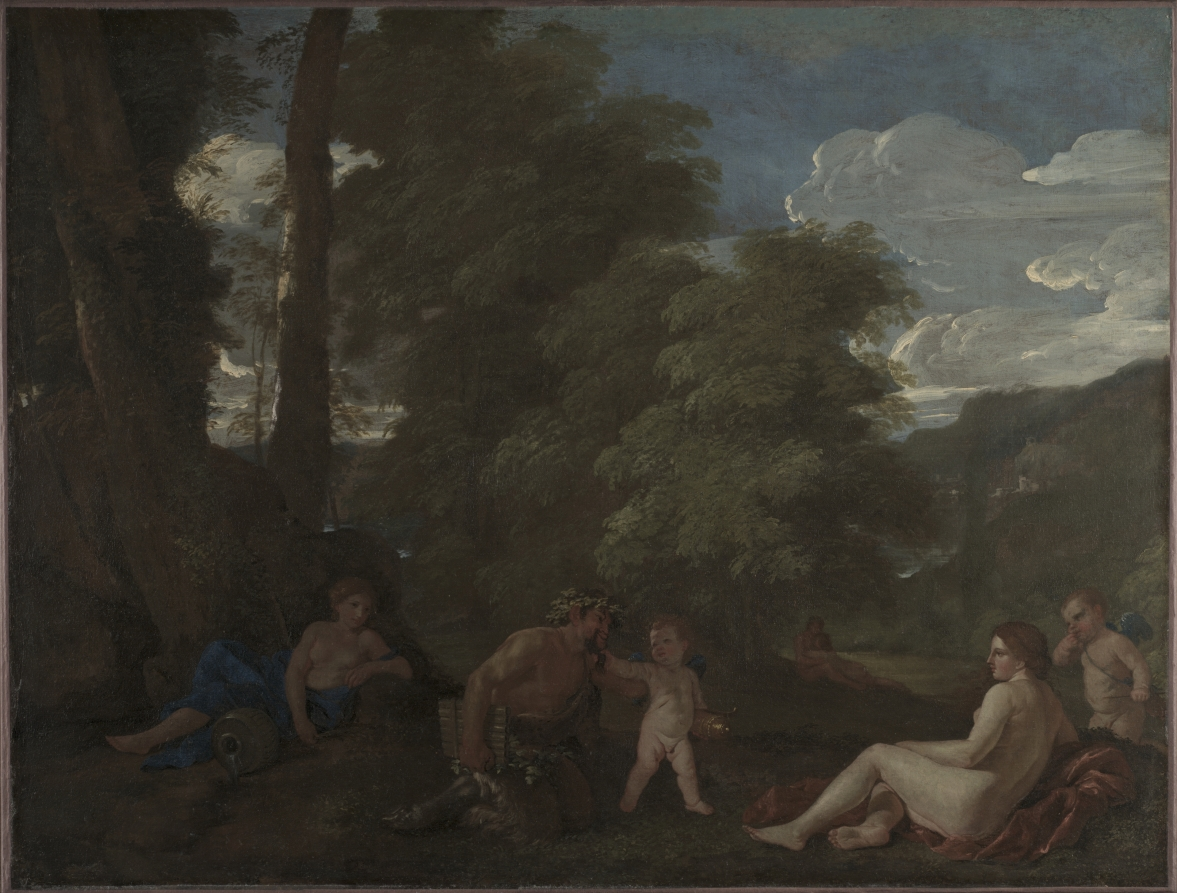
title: Nymphs and a Satyr (Amor Vincit Omnia)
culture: France, 17th century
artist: Nicolas Poussin (French, 1594–1665)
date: c. 1625–27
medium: oil on canvas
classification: Painting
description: Like his colleague Claude Lorrain, Poussin depicted historical and mythological subjects in landscapes inspired by the countryside around Rome. His themes were often complex, and frequently incorporated witty allusions to classical texts. Here, a playful cupid tugs Pan, the goatlegged Greek god of the woods, toward Venus, the goddess of love. The painting cleverly illustrates the Latin phrase amor vincit omnia, or “love conquers all” (in Greek, pan means “all”). The woodland setting represents the idyllic paradise of Pan’s home.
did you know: After arriving in Rome and experiencing financial instability, Nicolas Poussin turned to painting more popular, lucrative mythological scenes, such as those depicting nymphs and satyrs.